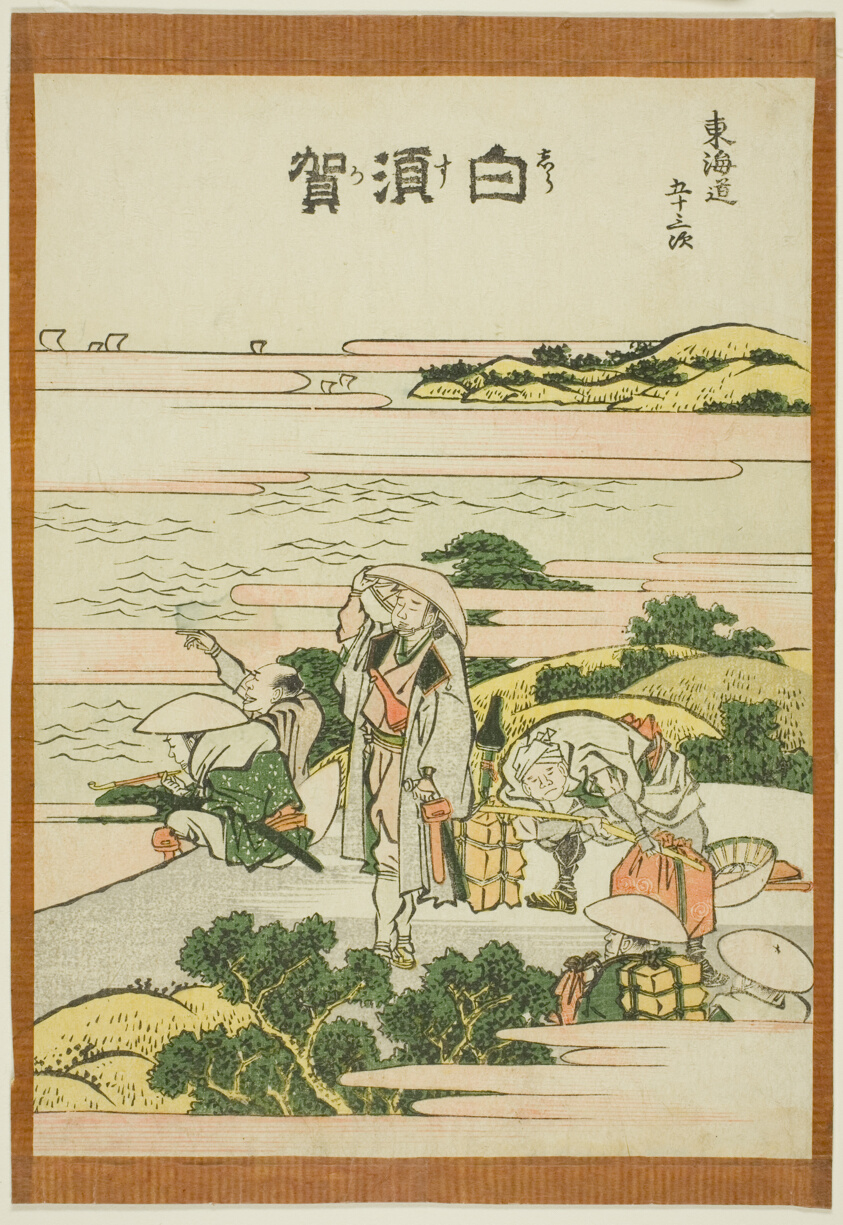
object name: Print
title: Shirasuka, from the series "Fifty-three Stations of the Tokaido (Tokaido gojusan tsugi)"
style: Japanese (culture or style)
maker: Katsushika Hokusai 葛飾 北斎; Japanese, 1760-1849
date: c. 1806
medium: Color woodblock print; chuban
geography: Japan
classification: woodblock print; print; asian art